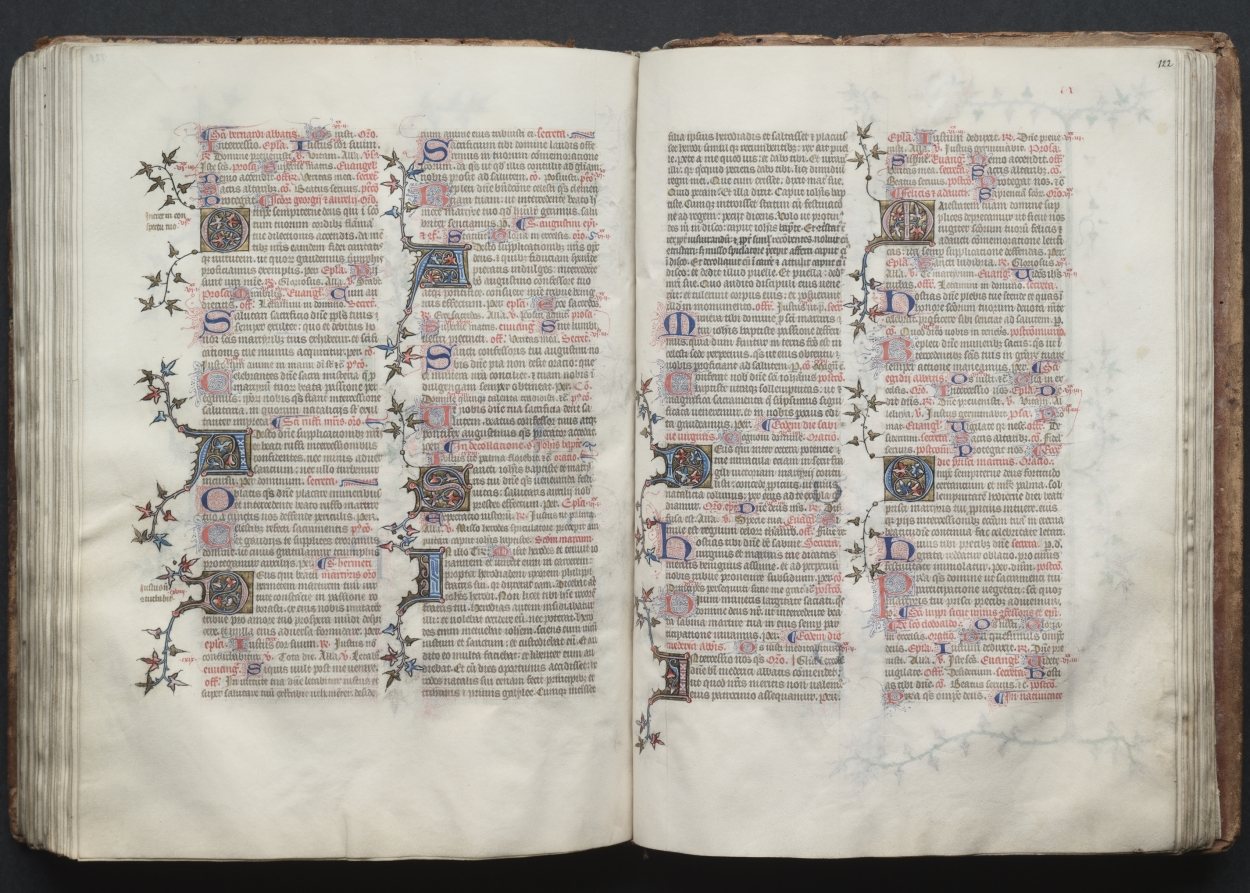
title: The Gotha Missal: Fol. 122r, Text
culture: France, Paris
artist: Master of the Boqueteaux (French)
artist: and Workshop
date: c. 1375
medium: ink, tempera, and gold on vellum; blind-tooled leather binding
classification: Bound Volume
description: The style and quality of this manuscript's decoration is typical of deluxe Parisian books made for aristocratic or royal patrons. Most of the book's decoration appears to be the work of the Master of the Boqueteaux, an artist active at the court of King Charles V (died 1380). His style was apparently shared by a number of book illuminators working in and around Paris. It is very possible that the Gotha Missal belonged to Charles V, but is not provable because the manuscript has no royal portraits and lacks a colophon. Given the book's magnificent decoration, however, it would seem that it was produced for a Valois prince, if not for the king himself. The manuscript receives its name from the German dukes of Gotha, its later owners.